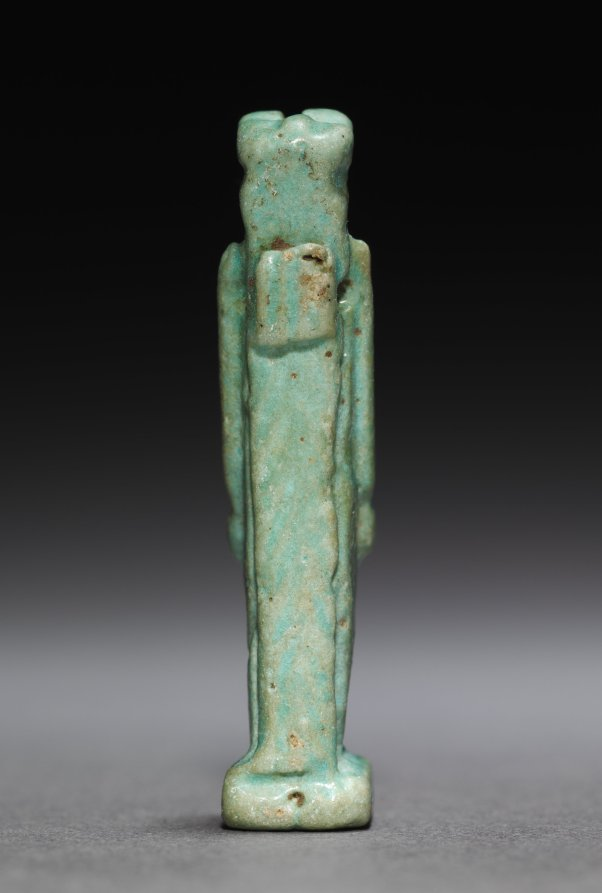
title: Amulet of Taweret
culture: Egypt, Greco-Roman period (332 BCE–395 CE), Ptolemaic dynasty (305–30 BCE)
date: 305–30 BCE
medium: light robin's egg blue faience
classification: Amulets